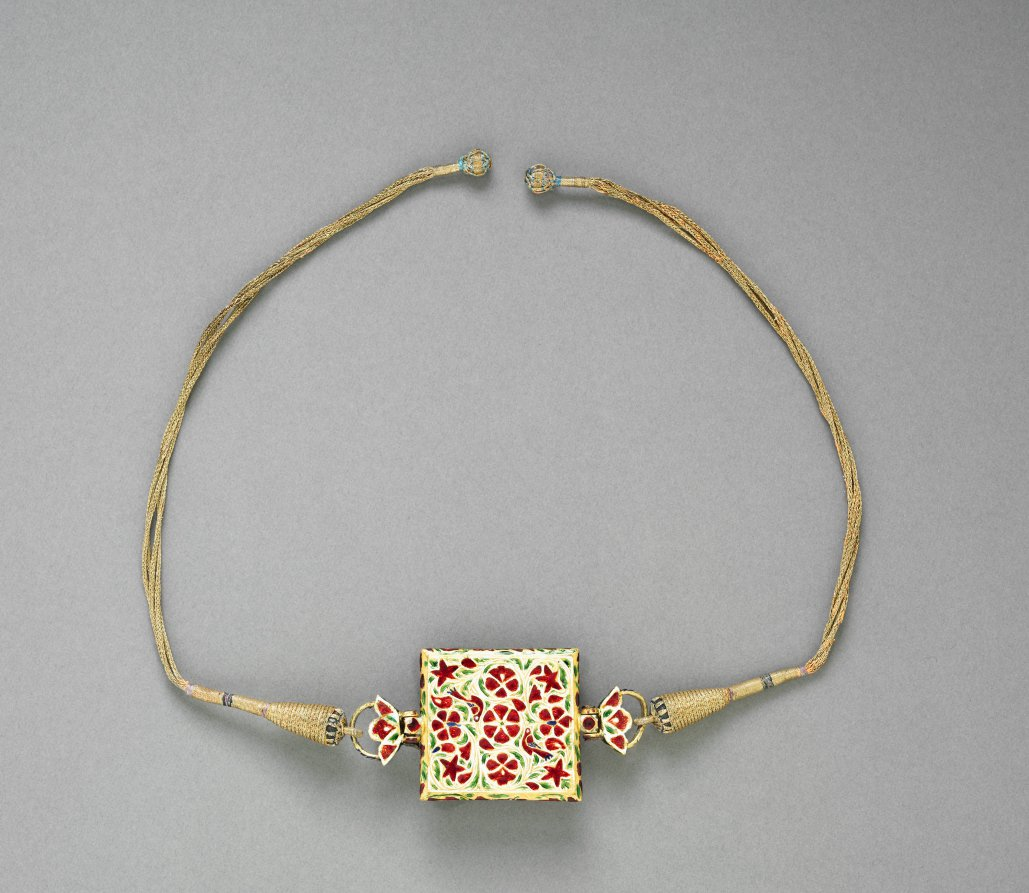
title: Wristlet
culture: India, Punjab (?)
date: 18th Century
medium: silver gilt with semiprecious stones and enamel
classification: Jewelry